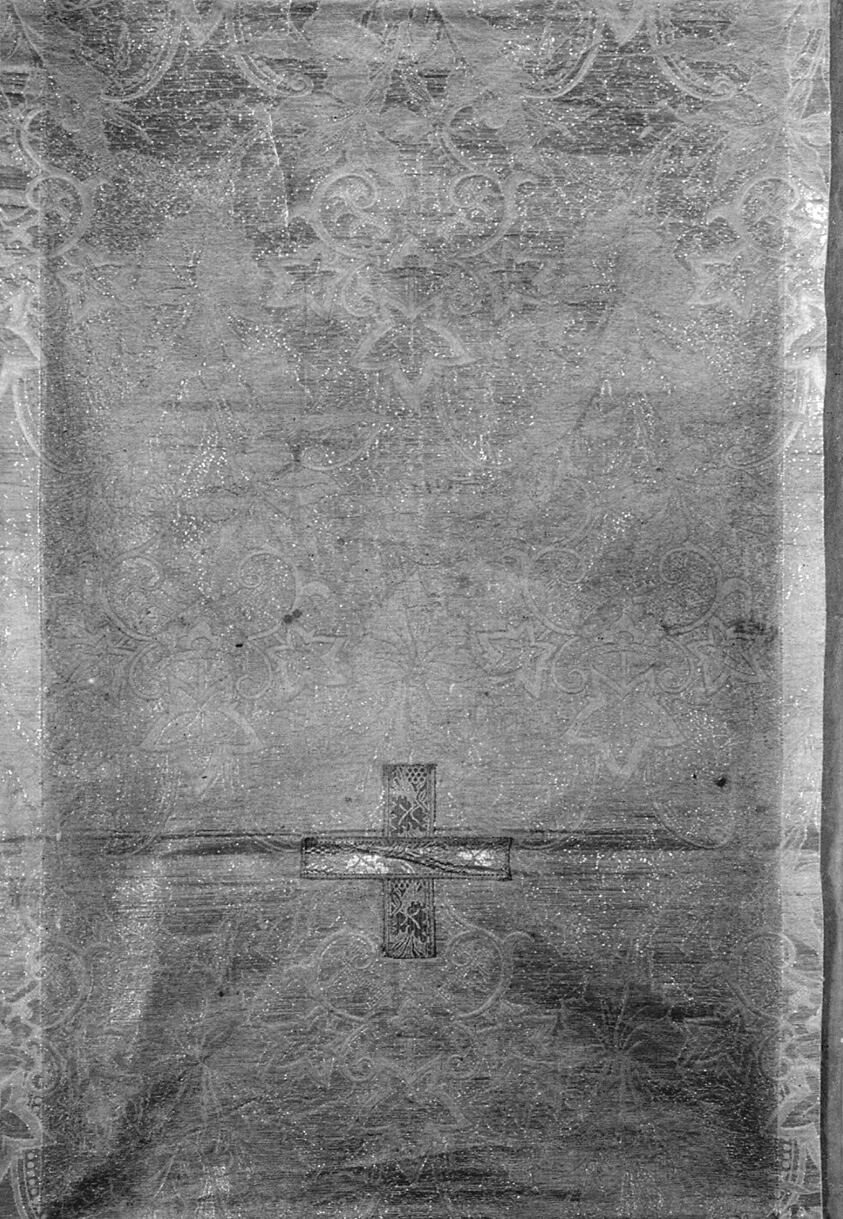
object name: Textile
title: Panel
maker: Russia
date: 1875/1900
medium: Fancy compound satin (research card)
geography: Russia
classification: textile; weaving